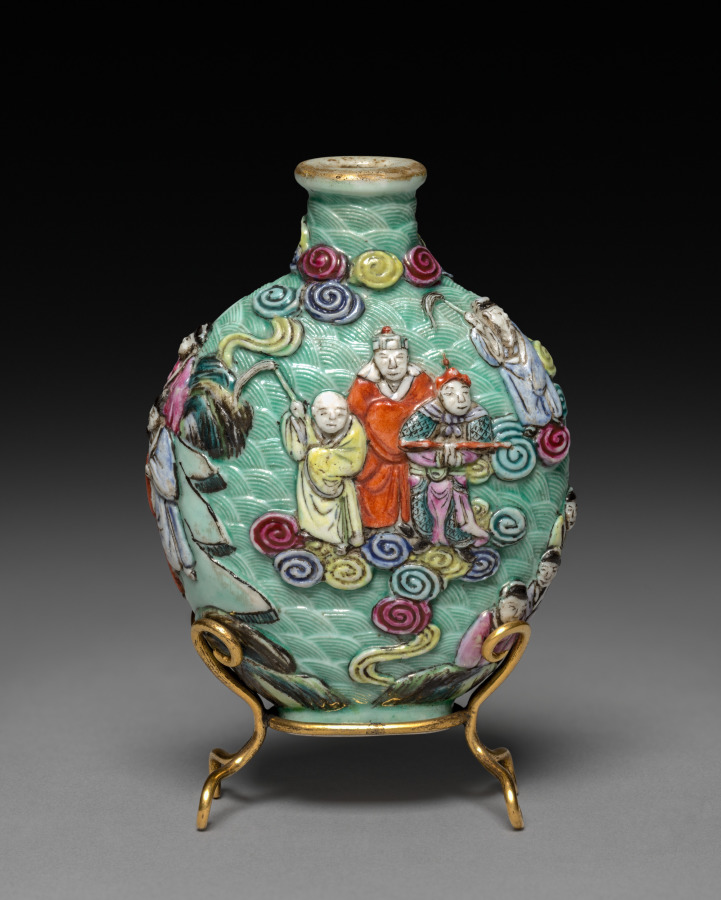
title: Flattened Ovoid Snuff Bottle with Stopper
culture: China, Qing dynasty (1644-1911), Jiaqing reign (1796-1820)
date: 1796–1820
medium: porcelain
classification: Ceramic